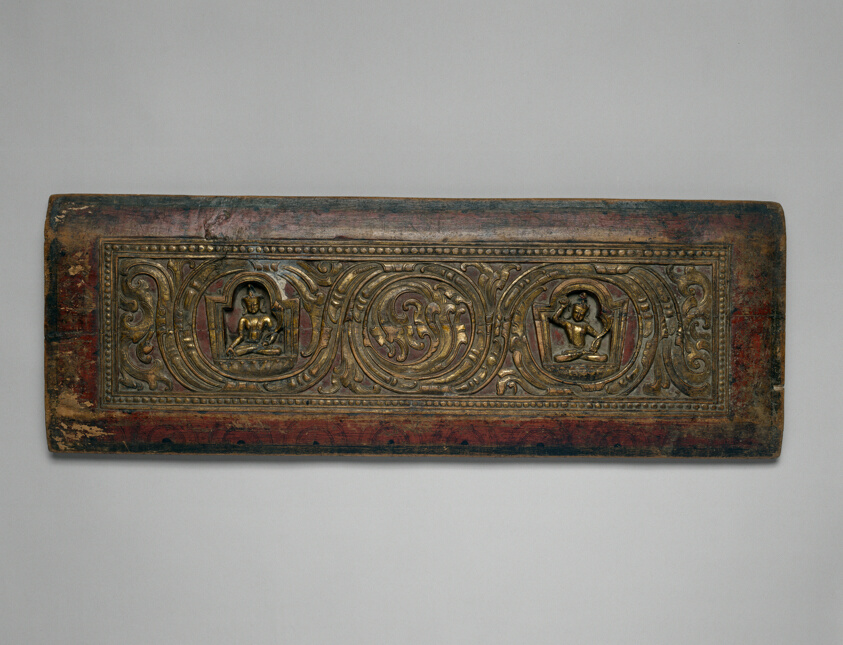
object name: Book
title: Buddhist Manuscript Cover with the Bodhisattvas Avalokiteshvara and Manjushri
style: Himalayan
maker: Tibet; Central Tibet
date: c. 1300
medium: Wood with traces of gilding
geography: Tibet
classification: wood; asian art; book